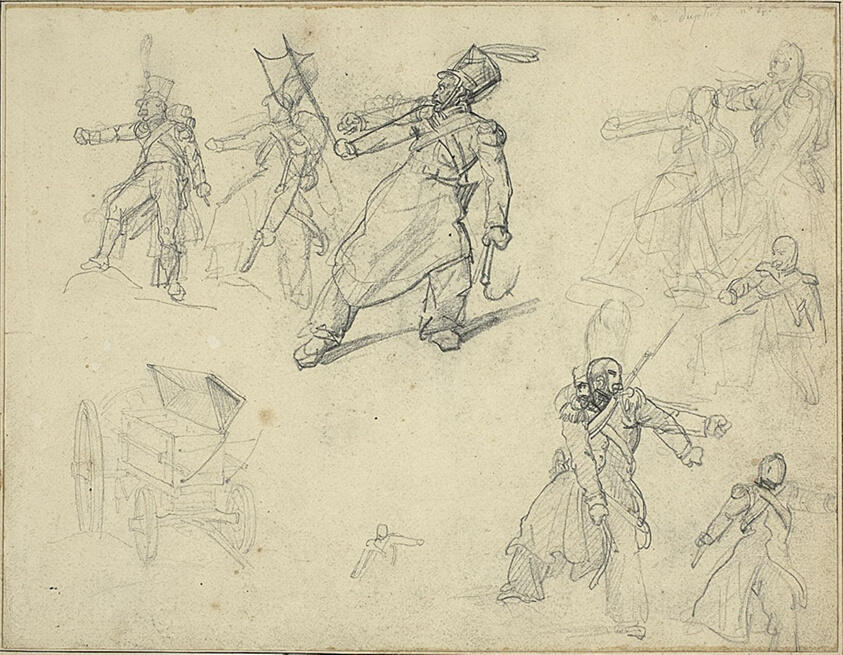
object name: Drawing and Watercolor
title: Studies of a Grenadier and a Munitions Cart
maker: Jean Louis André Théodore Géricault (French, 1791-1824)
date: c. 1818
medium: Graphite, on cream wove paper, perimeter mounted on cream wove paper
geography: France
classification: graphite; drawings (visual works); prints and drawing